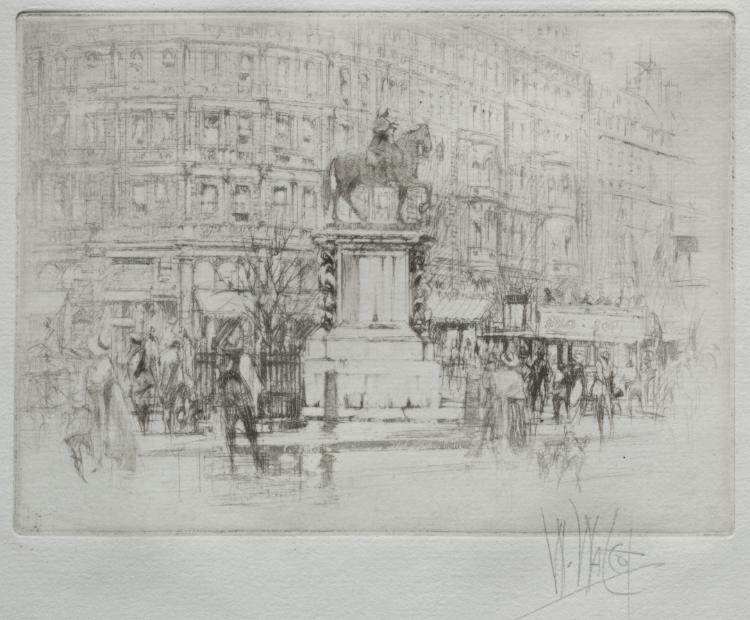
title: Charing Cross: The Statue of Charles I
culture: England, 20th century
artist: William Walcot (British, 1874–1943)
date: 1919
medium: etching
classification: Print